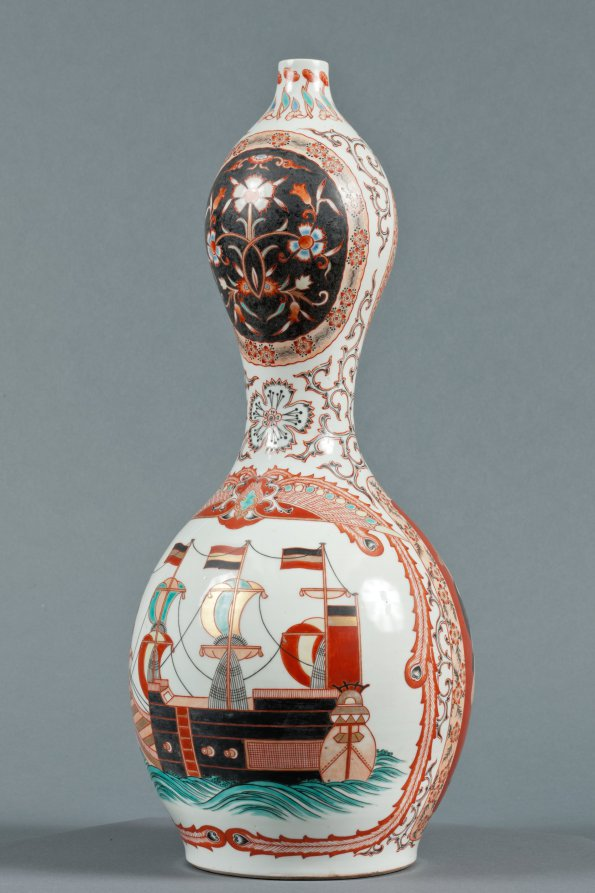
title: Bottle with Western Ships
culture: Japan, Edo period (1615–1868)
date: c. 1800–1868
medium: Porcelain with decoration in colored enamels and underglaze blue, overglaze enamels, and gold (Hizen ware, Arita type)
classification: Ceramic